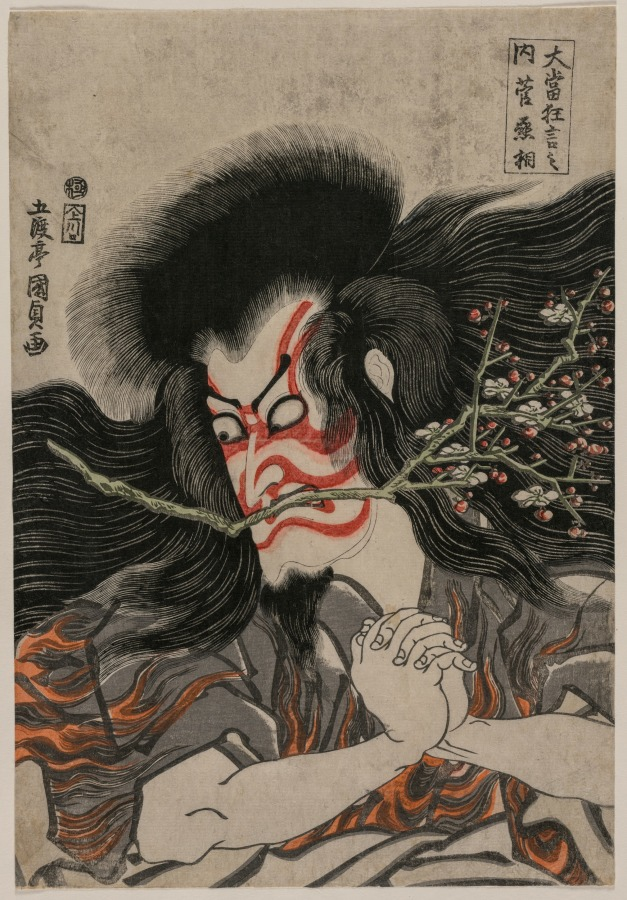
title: Ichikawa Danjuro VII as Kan Shojo in the Mt. Tenpai Scene, from the series Famous Kabuki Plays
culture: Japan, Edo period (1615–1868)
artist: Utagawa Kunisada (Japanese, 1786–1865)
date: 1814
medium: color woodblock print, with mica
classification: Print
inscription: Signature: Gototei Kunisada ga. Publisher: Kawaguchiya Uhei (Kawaguchi and emblem). Censorship Seal: kiwame.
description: Here, the actor plays the role of an exiled statesman, transforming himself into a vengeful thunder god. The red-and-white make-up style—kumadori, or "shadow painting"—is characteristic of the aragoto manner of portraying heroic roles. The crossed eyes and clenched mouth—in this role a plum blossom branch is added—demonstrates the conventional mie pose used by Kabuki actors to express intense emotion at the most dramatic moment in the play. The audience applauds the actor’s ability to hold this pose, influenced by the stylized movements of the puppets in the famous Bunraku theater. This sensational transformation of the hero is the high point of the scene.